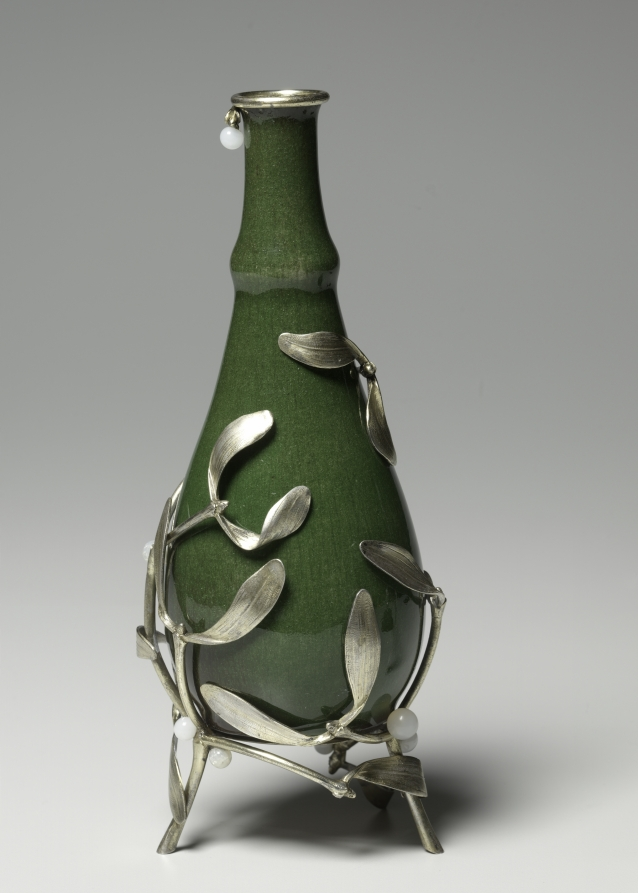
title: Vase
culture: France, late 19th Century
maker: Auguste Delaherche (French, 1857–1940)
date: c. 1893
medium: stoneware with silver mounts and glass beads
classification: Ceramic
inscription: Impressed on bottom of vase: August Delaherche, 1894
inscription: On mount: P. Hamelin 1893